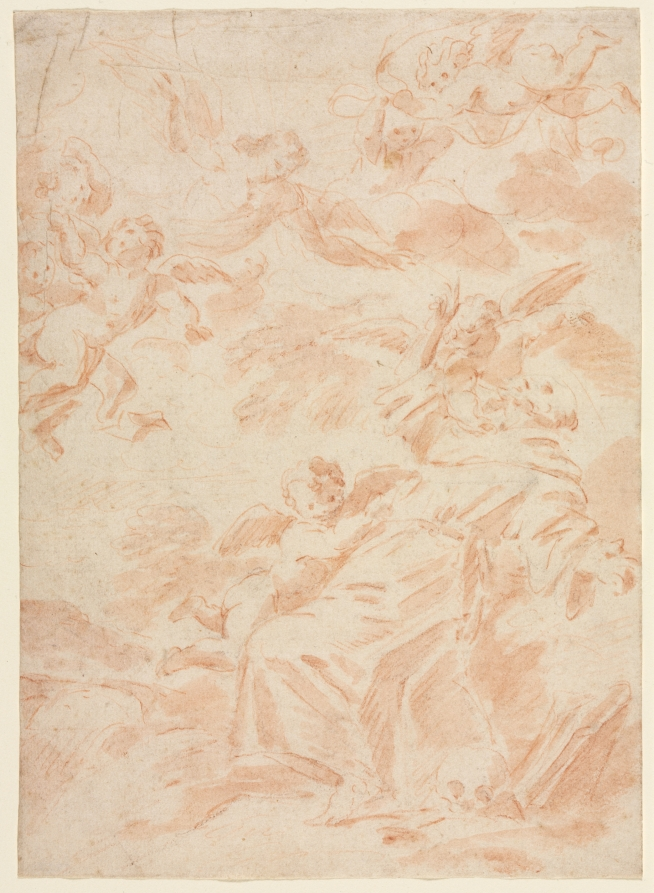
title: The Stigmatization of Saint Francis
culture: France, 18th century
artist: François Lemoyne (French, 1688–1737)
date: first third 1700s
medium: red chalk and brush and red wash over traces of black chalk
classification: Drawing